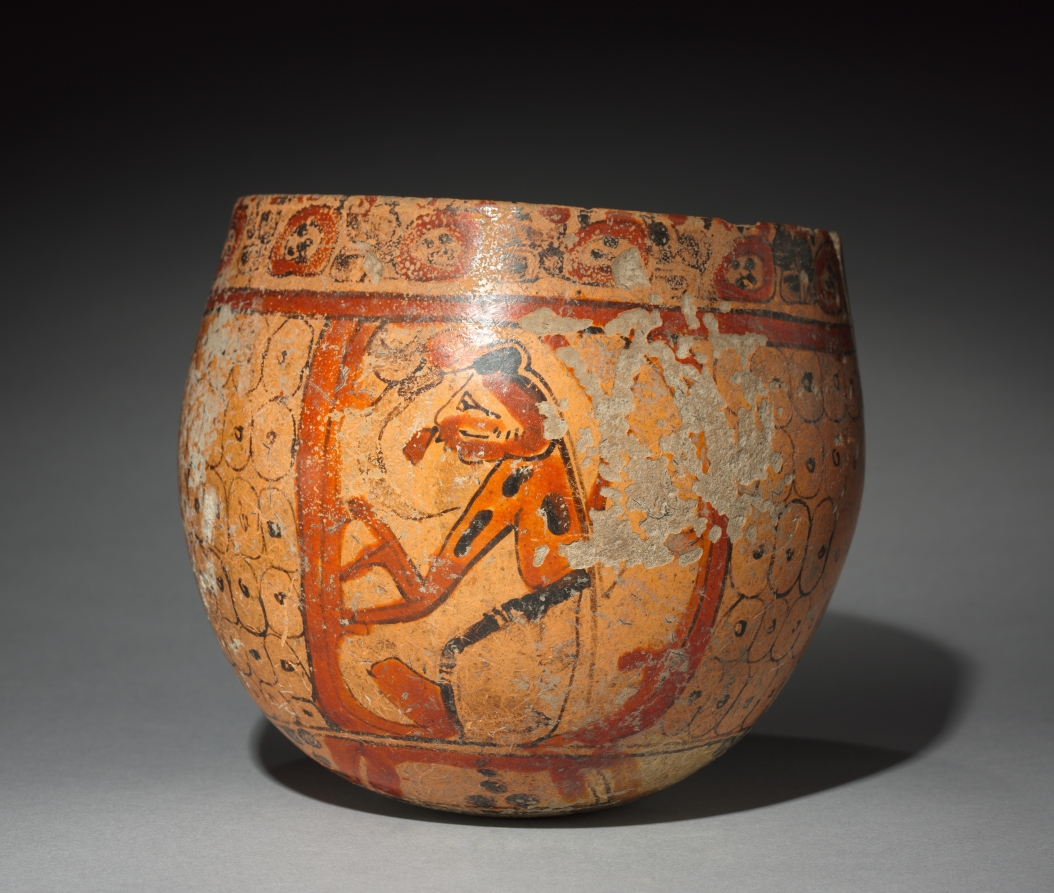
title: Bowl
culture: Mexico or Guatemala, Maya, Late Classic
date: 600–900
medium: pottery with burnished, colored slips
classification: Ceramic